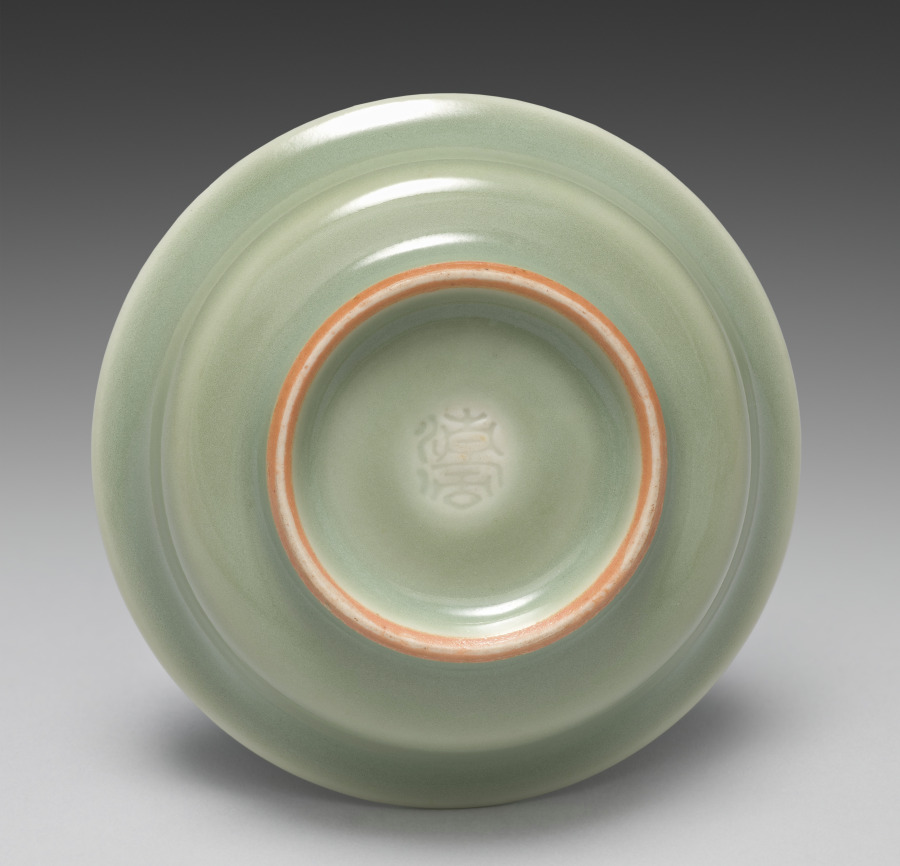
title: Saucer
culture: Japan, Meiji period (1868–1912)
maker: Seifū Yohei III (Japanese, 1851–1914)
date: 1893–1914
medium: One from a set of ten dishes; porcelain with green glaze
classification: Ceramic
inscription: 清風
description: Yohei III’s main output for his sophisticated clientele was in the form of tea sets and dining sets. He created a range of dishes in green glazes. He often produced in pairs, sets of five, or sets of ten. For this set of ten small dishes in a simple, round form that emphasizes the glaze above all, the box lid designates the piece as seiji, or green-glazed porcelain, using a general term for the extensive palette of green glazes often called celadon in English. The box lid further identifies the dishes themselves as tōchō, literally “bean-sized saucers,” a size that makes them suitable for dipping sauces.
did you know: The ten dishes in this set are stored in stacks of five in a two-compartment box.